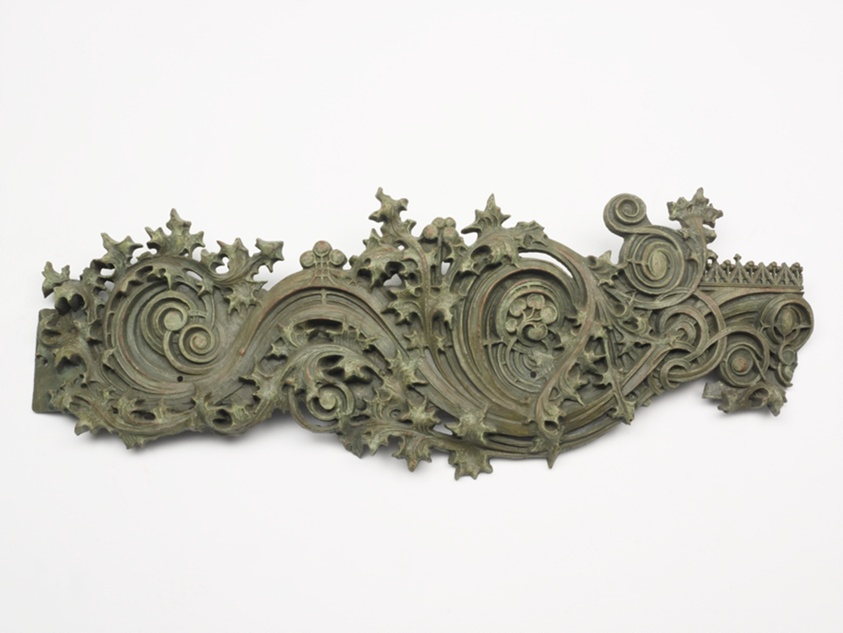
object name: Architectural fragment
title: Cornice Section from the Gage Building, Chicago, Illinois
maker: Louis H. Sullivan (American, 1856–1924); Modeled by Kristian Schneider (American, born Norway, 1864–1935); Cast by Winslow Brothers Iron Works (American, 1887–1921); Architect: Holabird & Roche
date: 1898–99 (removed 1955)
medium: Cast iron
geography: Michigan Avenue, 18 South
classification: architectural fragment; architecture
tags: Chicago